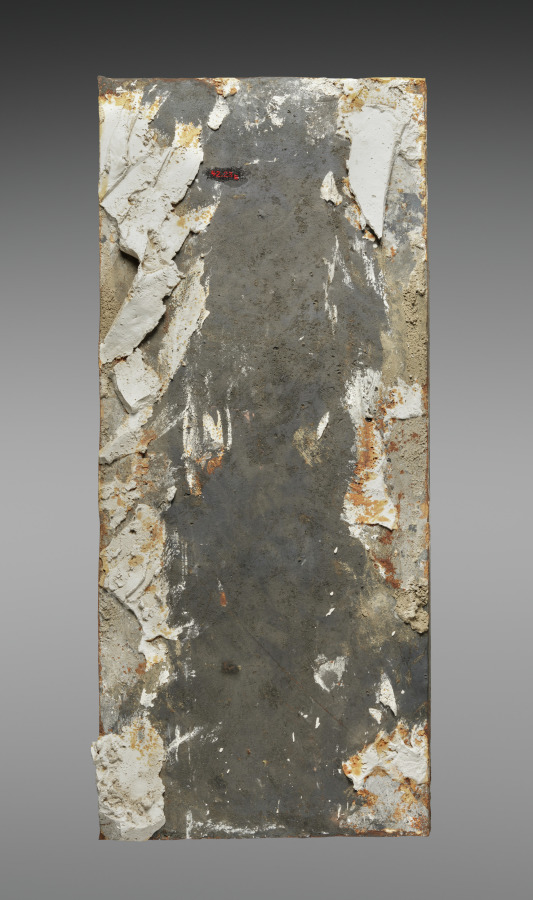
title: Set of Fire Linings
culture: France, style of Louis XVI, 18th Century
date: c. 1770–1780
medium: cast iron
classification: Furniture and woodwork